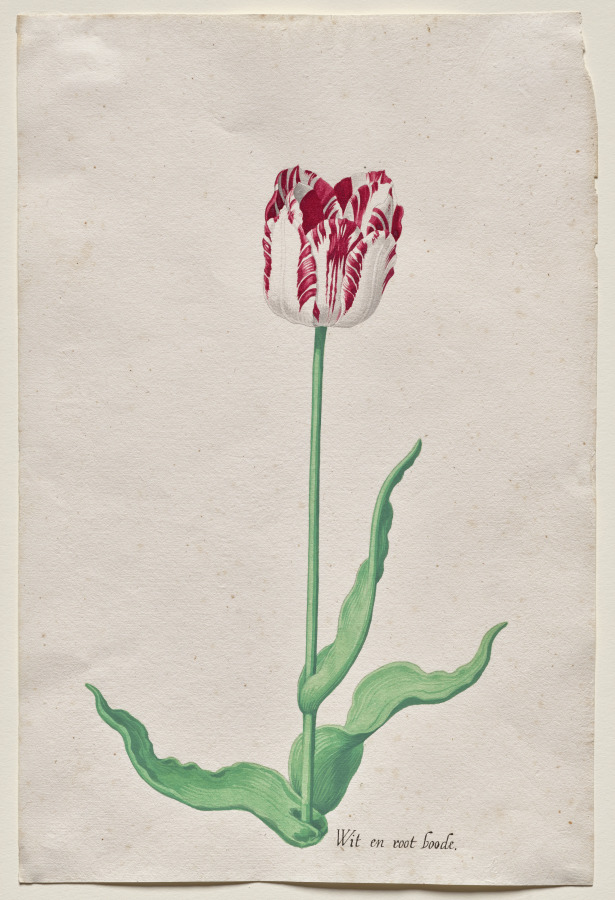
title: Study of a Tulip (Wit en root boode)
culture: Netherlands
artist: Pieter Holsteyn II (Dutch, c.1612–1673)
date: c. 1645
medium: Point of brush and transparent and opaque watercolors with traces of graphite and gum glazing on antique laid paper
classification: Drawing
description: This image of a tulip was made as part of a tulip book used as a grower’s marketing tool during the so-called tulip mania, a speculative bubble in 17th-century Holland, when ten tulip bulbs could cost more than a stately Amsterdam canal house. The striations on the tulip, which were caused by a virus in the bulb, made it especially valuable. Pieter Holsteyn II was one of many artists in the Netherlands at the time who specialized in botanical illustration.This tulip's Dutch name, inscribed on the sheet, means "white and red messenger."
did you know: In 17th-century Holland, some tulip bulbs were as expensive as a stately Amsterdam canal house.